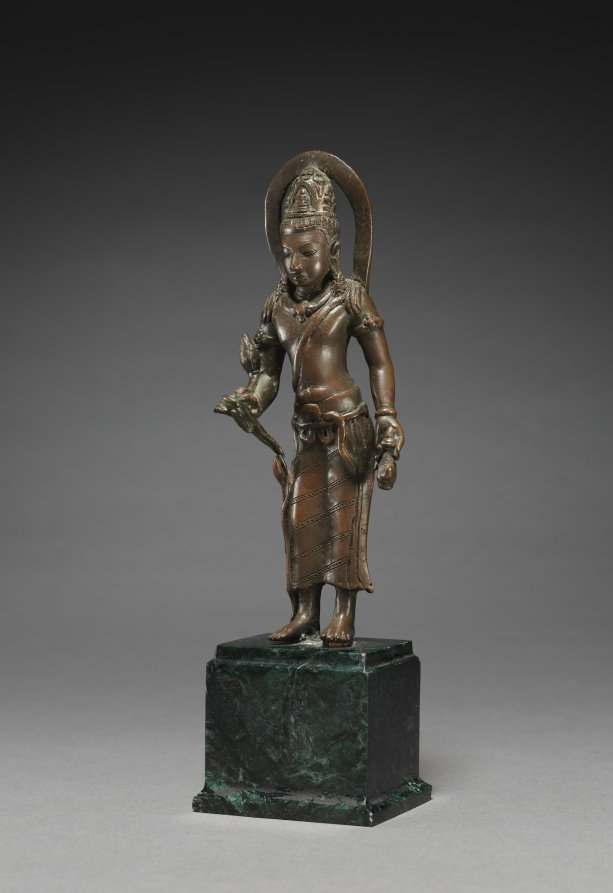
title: Padmapani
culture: Java, Pagan, Sailendra Period, 8th-9th Century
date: 700s-800s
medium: copper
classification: Sculpture